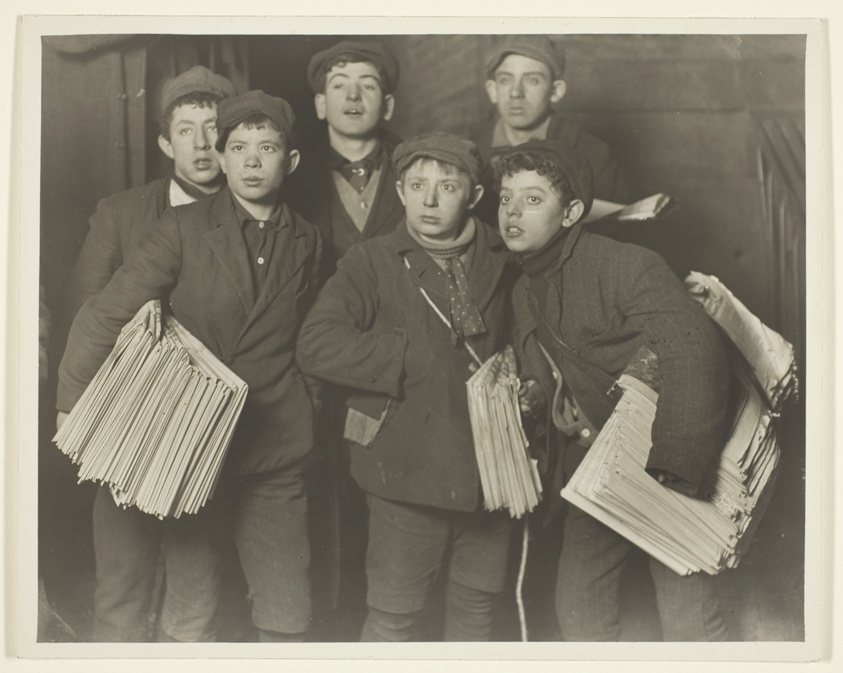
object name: Photograph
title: Newboys, Brooklyn Bridge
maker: Lewis Wickes Hine (American, 1874–1940)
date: 1906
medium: Gelatin silver print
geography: United States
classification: gelatin silver (developing-out-paper) pr; photographic process; photography; photograph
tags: Collected by Hugh Edwards